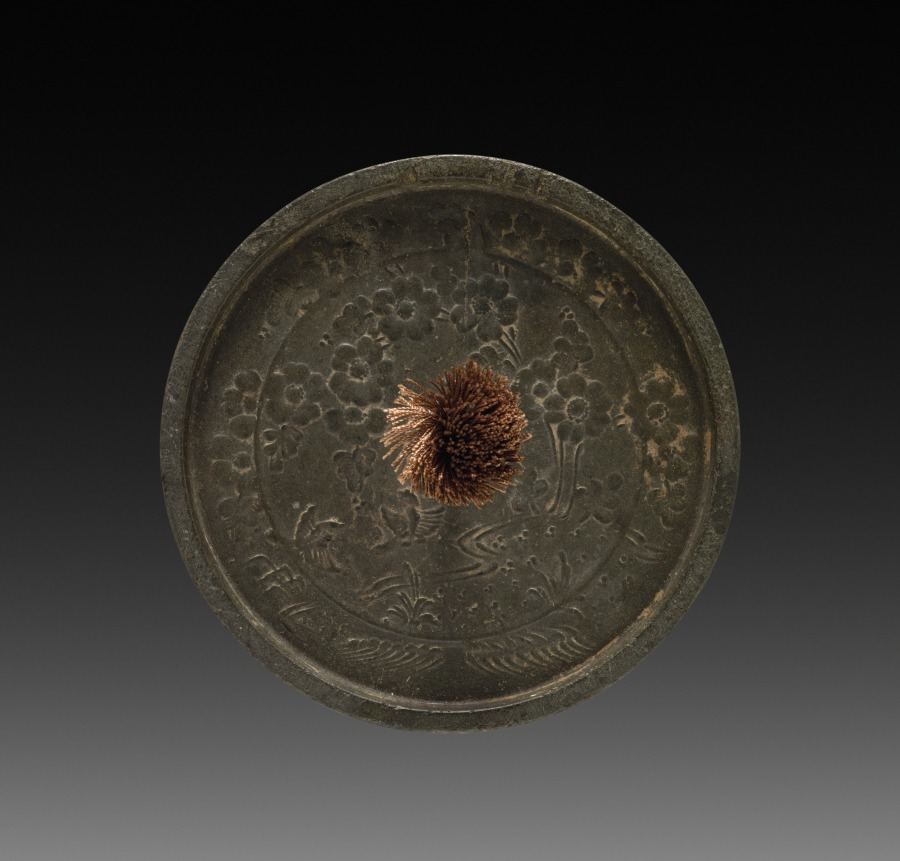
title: Mirror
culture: Japan, Heian period (794–1185)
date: 794–1185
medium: bronze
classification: Metalwork